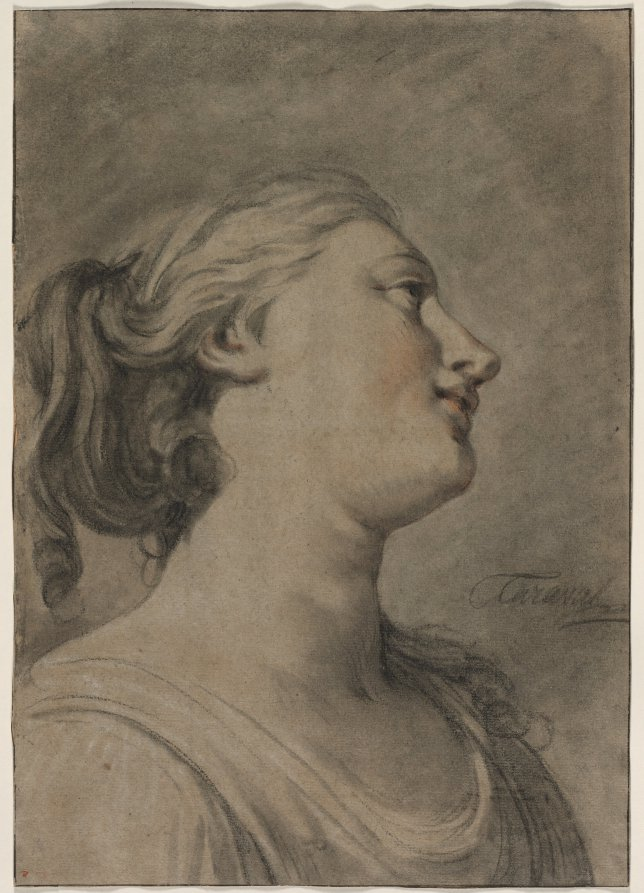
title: Head of a Female Figure in Profile, Turned to the Right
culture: France, 18th century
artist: Hughes Taraval (French, 1729–1785)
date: c. 1763–1770?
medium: charcoal with red and white chalk and stumping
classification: Drawing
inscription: signed, lower right, in charcoal or black chalk: Taraval; verso of secondary support, center, in brown ink: No 2; center, in graphite: 144 [circled]; lower right, in graphite: R + S / 5985; lower right, in graphite: 1240 [underlined] / hu77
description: Like the sheet shown nearby by Greuze, this drawing belongs to a type of work known as an expressive head (tête d'expression). Capturing the representation of a specific emotion on the human face became a standard exercise for artists in France and was especially popular during the second half of the 1700s. In 1758, a special prize for drawing the expressive head was established at the Royal Academy of Painting and Sculpture. Although we have no documentation regarding the specific emotion Taraval wanted to capture here, the work may represent admiration or adoration.